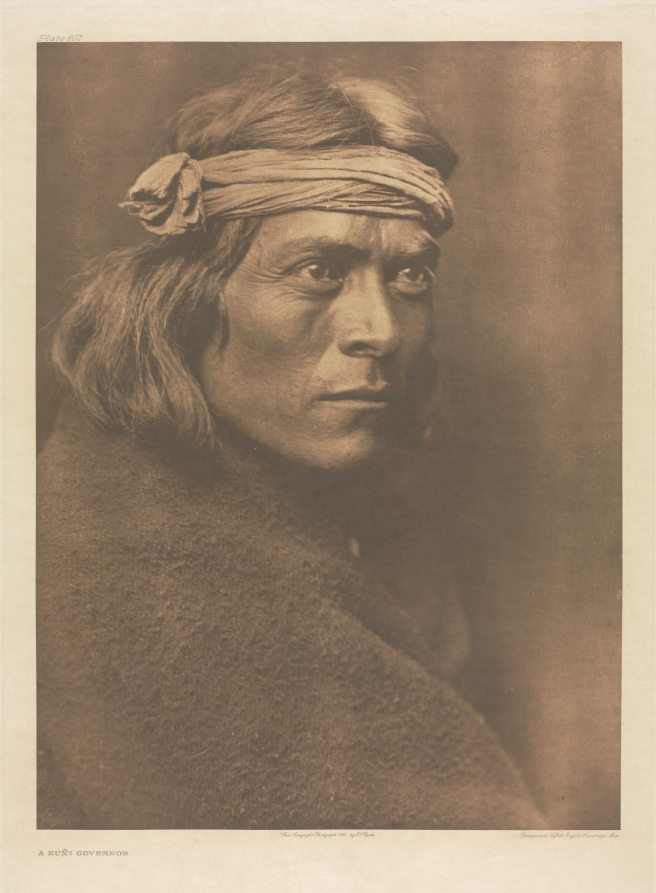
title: Portfolio XVII, Plate 607: A Zuñi Governor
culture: America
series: The North American Indian: being a series of Portfolios picturing and describing the Indians of the United States, the Dominion of Canada, and Alaska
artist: Edward S. Curtis (American, 1868–1952)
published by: The University Press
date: 1905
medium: photogravure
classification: Portfolio